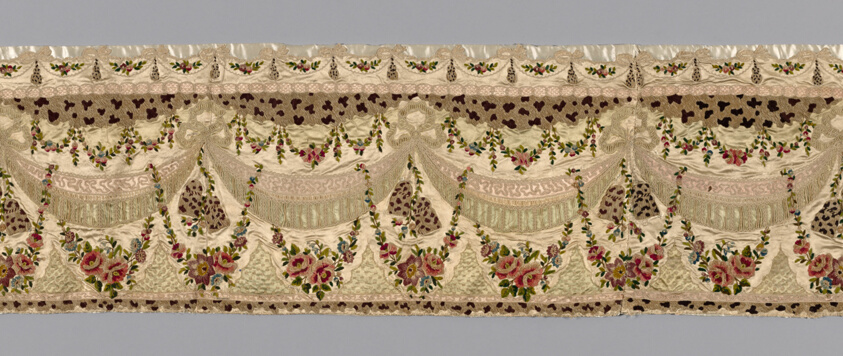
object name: Textile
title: Valance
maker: France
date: 19th century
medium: Silk, warp-float faced satin weave; painted appliquéd with linen, gauze weave; embroidered with silk chenilled and yarns in darning stitches, chain, and satin stitches; French knots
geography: France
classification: textile; needlework (visual works)